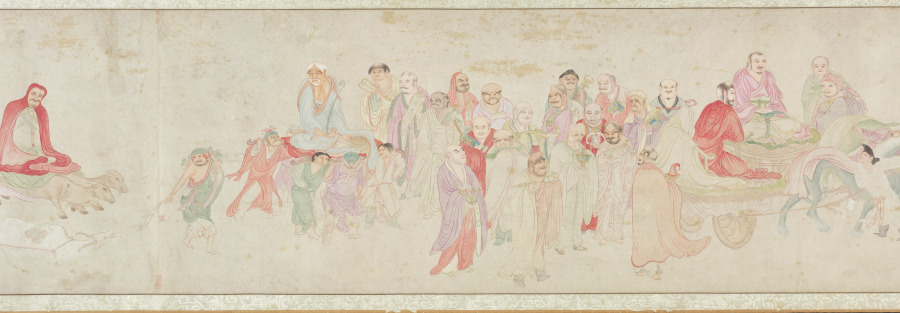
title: The Five Hundred Arhats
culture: China, Ming dynasty (1368–1644)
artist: Wu Bin (Chinese, active c. 1591–1626)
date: 1591–1626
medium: Handscroll; ink and color on paper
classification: Painting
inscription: 枝隱頭陀吳彬齋心拜寫 [印]吳彬之印; 文中父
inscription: 7 seals of Qianlong emperor (r. 1736–95): Gu xi tian zi 古希天子; Shou 壽; Qianlong jian shang 乾隆鑑賞; San xi tang jing jian xi 三希堂精鑑璽; Yi zi sun 宜子孫; Tai shang huang di zhi bao 太上皇帝之寳; Qian qing gong bao 乾清宮寶.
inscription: 6 seals of Cheng Qi 程琦 (1911–1988): Ke an geng zi wu shi yi hou suo de ming ji 可菴庚子五十以後所得名跡; 5 other Cheng Qi seals.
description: More than 66 feet long, this handscroll depicts 447 luohans, 72 attendants, and the bodhisattva of compassion at its very end. Luohans (arhats in Sanskrit), disciples of the Buddha and protectors of the Buddha’s law, possess supernatural powers and take on myriad external appearances. The amusing assortment of characters are engaged in an array of religious, secular, and miraculous activities. The painter used stylistic features borrowed from earlier artists, carefully controlled lines, and refined coloring. Wu Bin was a lay Buddhist and depicting this sort of image was part of a religious practice seeking understanding of the Buddha’s teaching.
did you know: Far advanced on the path to enlightenment, arhats have the capacity to tame tigers, free dragons, and to float on water or in the air.